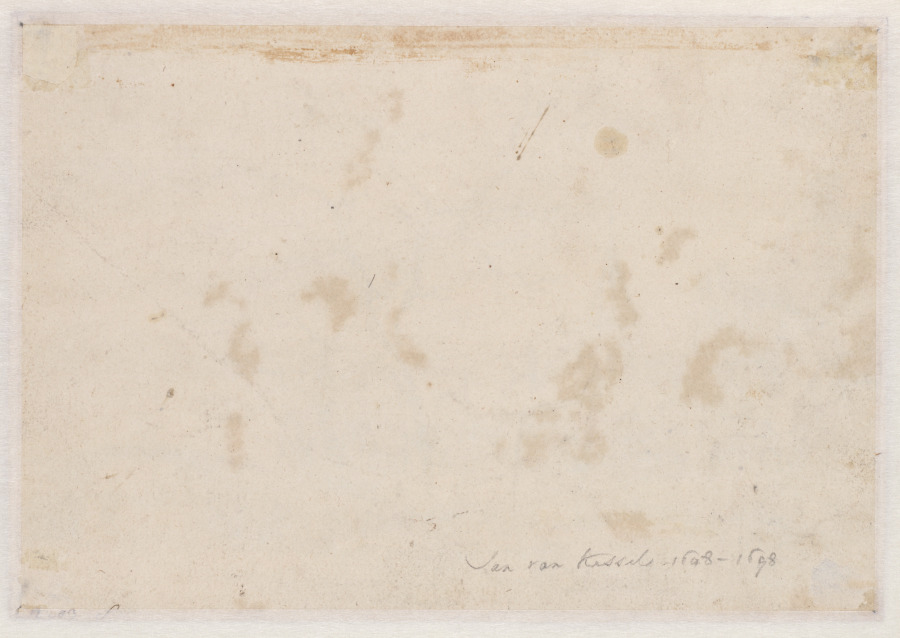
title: Winter Landscape with Skater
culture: Netherlands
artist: Jan van Kessel (Dutch, 1641–1680)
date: 1662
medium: brush and black ink and grey wash over black chalk on cream laid paper; brown ink framing line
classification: Drawing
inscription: recto, signed and date lower left in pen and black ink: JKesssel 1662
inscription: verso, inscribed in graphite, lower right: Jan van Kessel 16(0?)8-1698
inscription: verso, in lower left border (cut off and covered with hinge) [letters} 03 S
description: In this drawing, the Dutch landscape painter Jan van Kessel depicted a rustic rural scene showing rundown sheds beside a frozen canal with a small village church beyond. A skater glides under an overgrown stone bridge. Such rural landscape scenes, considered fundamentally Dutch, became the focus of the Dutch landscape school in the 17th century. Van Kessel was also noted for his trees; the central tree in this image was rendered with black chalk and grey ink wash to create a gently shimmering effect.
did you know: Frozen canals in 17th-century Holland were a mainstay of entertainment for skaters like the one seen in this drawing, providing access from town to town like roads.